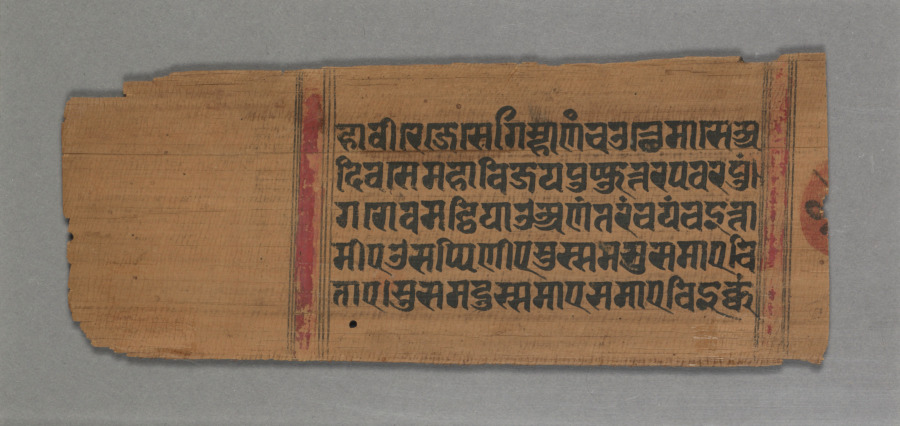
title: A Monk Preaching: Folio 2 (recto), from a Kalpa-sutra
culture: Western India, Gujarat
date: c. 1275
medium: gum tempera and ink on paper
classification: Painting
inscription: [[right margin]] esa mama pustika iti na vaktavyam